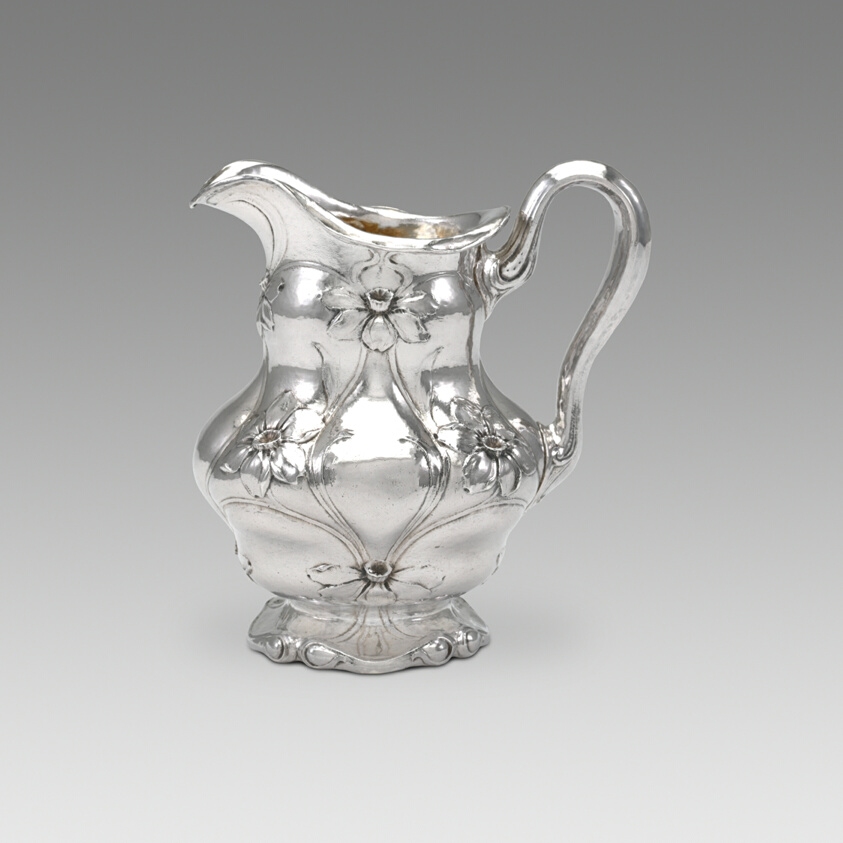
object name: Metalwork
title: Cream Pot (part of a set)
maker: Gorham Manufacturing Company (American, founded 1831); Providence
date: 1900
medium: Silver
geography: Providence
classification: creamer; silver; american decorative arts; american arts; decorative arts